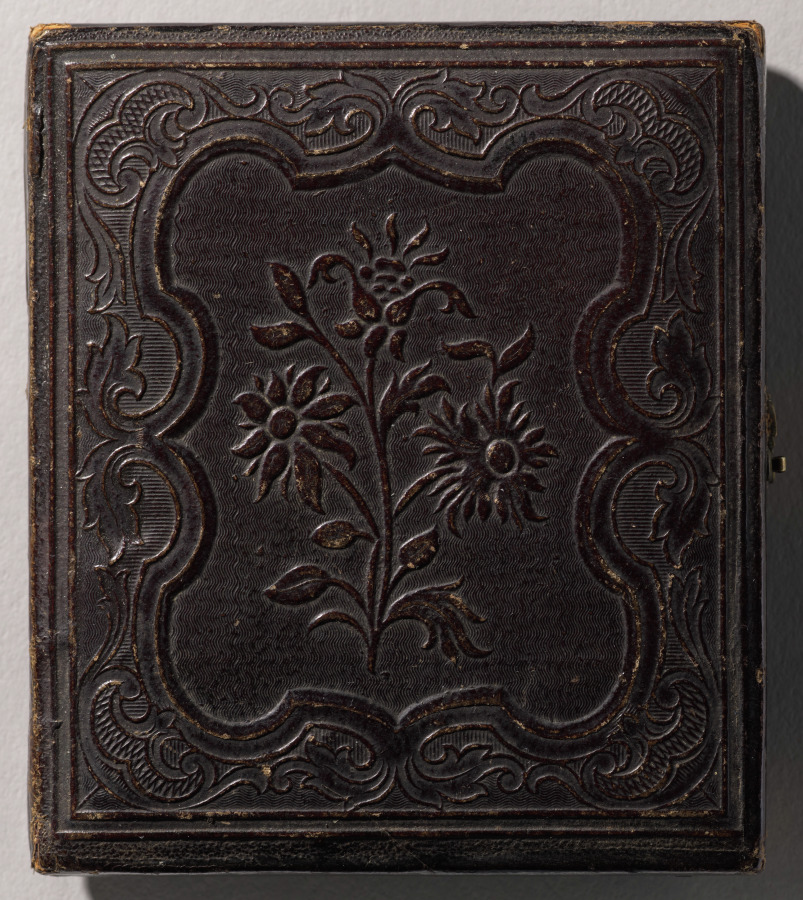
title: Boy with Cigar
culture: America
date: c. 1855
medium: daguerreotype, tinted, sixth plate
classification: Photograph